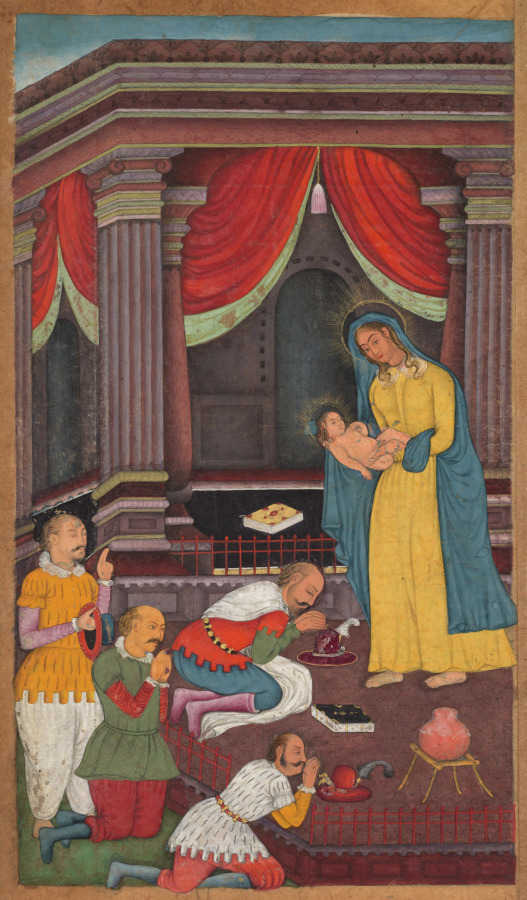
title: The Adoration of the Shepherds, from a Mirror of Holiness (Mir’at al-quds) of Father Jerome Xavier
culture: Mughal India, Allahabad, made for Prince Salim (1569–1627)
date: 1602–4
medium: Gum tempera, ink, and gold on paper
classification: Manuscript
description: Without reading the text, it would be difficult to identify the adorers as shepherds, because they are clothed as Portuguese merchants with ruffed collars and broad-brimmed hats. Mary stands with her divine newborn in a fenced enclosure, evocative of a sacred or royal space within a rather palatial setting, complete with pseudo-Ionic columns and heavy red draperies. The two books on the floor indicated to the Mughals that Christians, like Muslims, revere a definitive sacred scripture such as the Bible or the Koran.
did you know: The finishing details on this painting, such as two of the shepherds’ feet, the tile patterning, and probably arabesques, have not been completed.